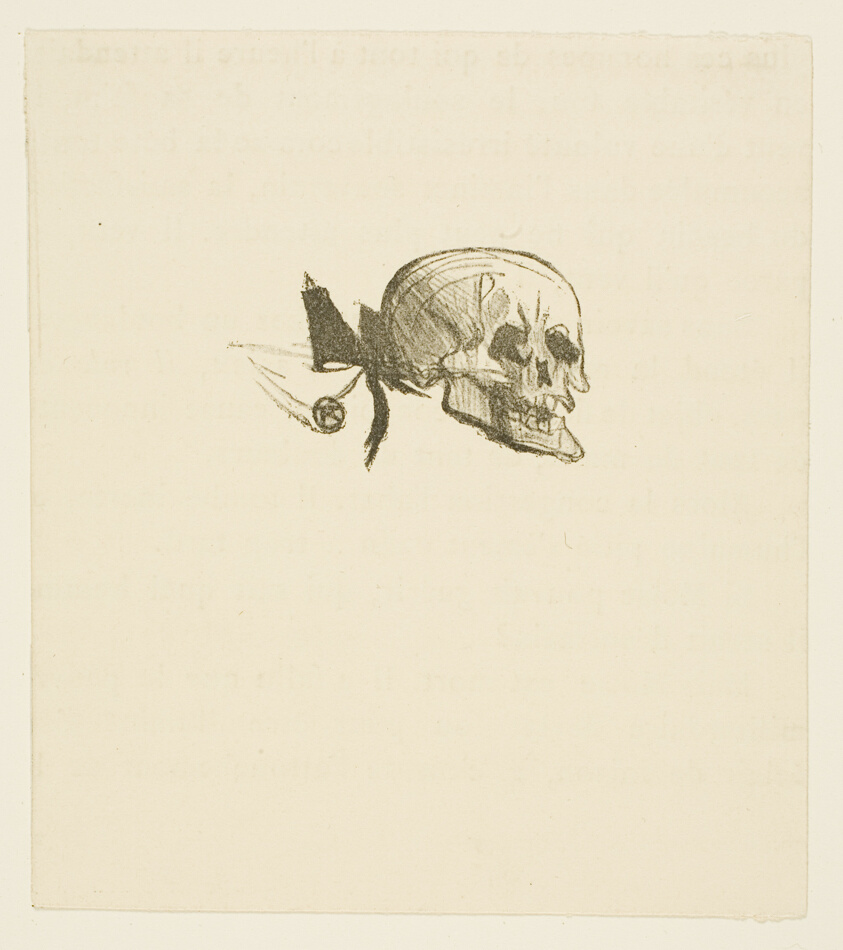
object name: Print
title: Tailpiece from Au Pied du Sinaï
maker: Henri de Toulouse-Lautrec (French, 1864-1901)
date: 1897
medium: Reproduction of a lithograph on cream wove paper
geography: France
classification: print (reproduction); prints and drawing; print